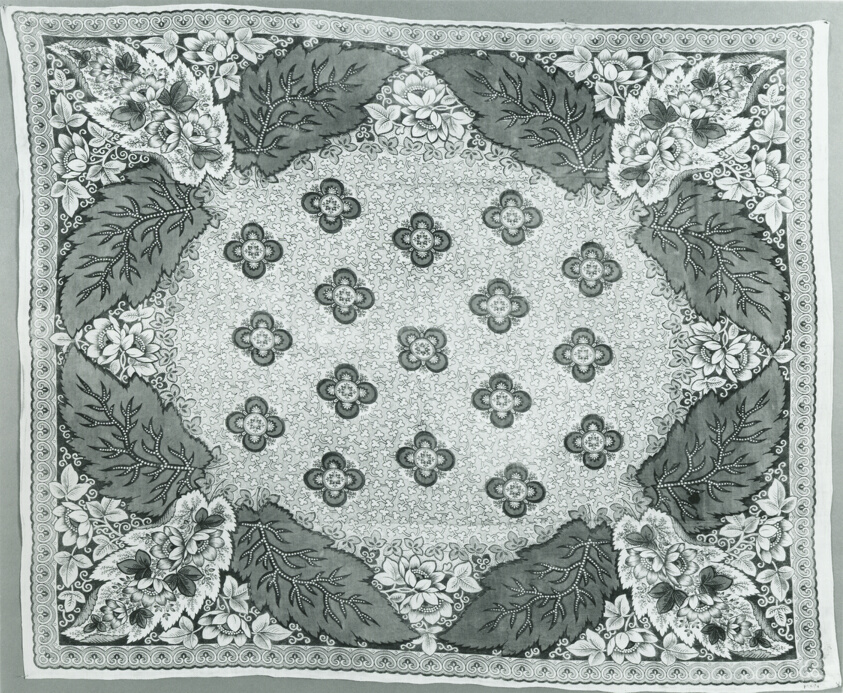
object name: Textile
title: Handkerchief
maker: France, Alsace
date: 19th century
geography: France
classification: textile; weaving - printed; accessories (object genre)